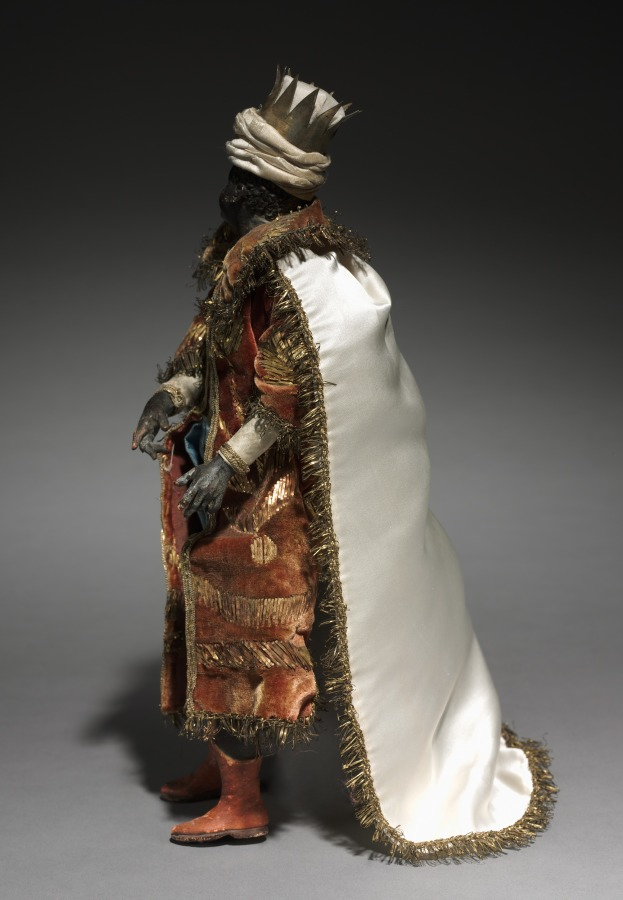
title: Figure from a Crèche: Negro Magus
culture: Italy, Naples, late 18th-early 19th century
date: 1780–1830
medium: painted wood and terracotta with various textiles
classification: Sculpture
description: The practice of creating scenes of the Nativity for the home dates from the early 1700s in Italy, where people began to set up doll-like figures of about a foot or less in height. The custom was particularly popular in Naples around 1800, where crèche scenes (crèche means cradle, or crib) included many figures, whose heads and hands of painted terracotta, stuffed cloth bodies, and clothing adapted from contemporary local costumes gave them an amazingly realistic character. Representations of the birth of Jesus can be traced to the first few centuries of Christianity. Both living creatures and sculptural depictions of them were used from early times. By the late middle ages it was customary to create life-size figures of wood or stone, naturalistically painted, to represent the characters who participated in the events of Jesus's early life. These sculptures were then arranged in scenes illustrating one or both of the most important of these events, the Adoration of the Shepherds and the Adoration of the Magi-the three kings from the East who came to pay homage to the Christ child. Used in churches, these large figures were especially popular in Italy, Central Europe, Spain, and Portugal.